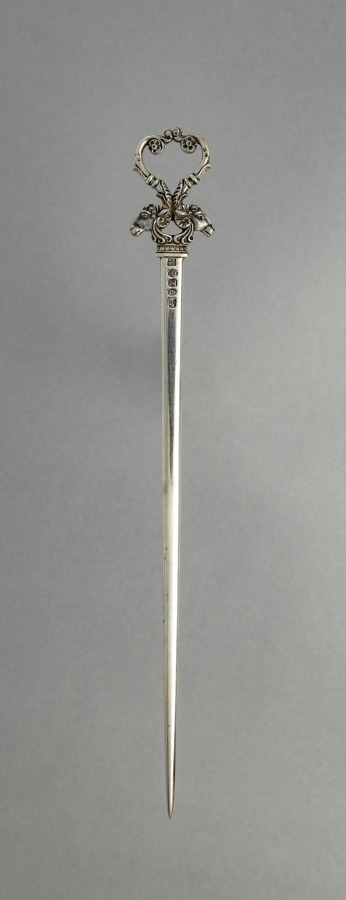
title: Skewer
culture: England, London, late 18th-early 19th Century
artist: firm of William Eley (British)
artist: firm of William Fearn (British)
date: 1800–1801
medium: silver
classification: Silver